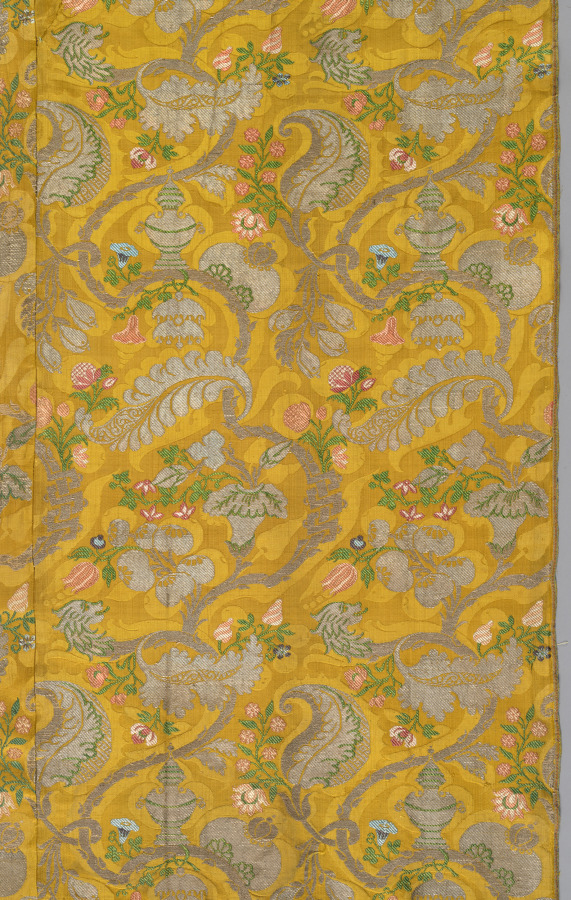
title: Table Cover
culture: Italy, Venice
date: late 1600s - early 1700s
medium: satin weave, brocaded; silk and metal thread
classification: Textile